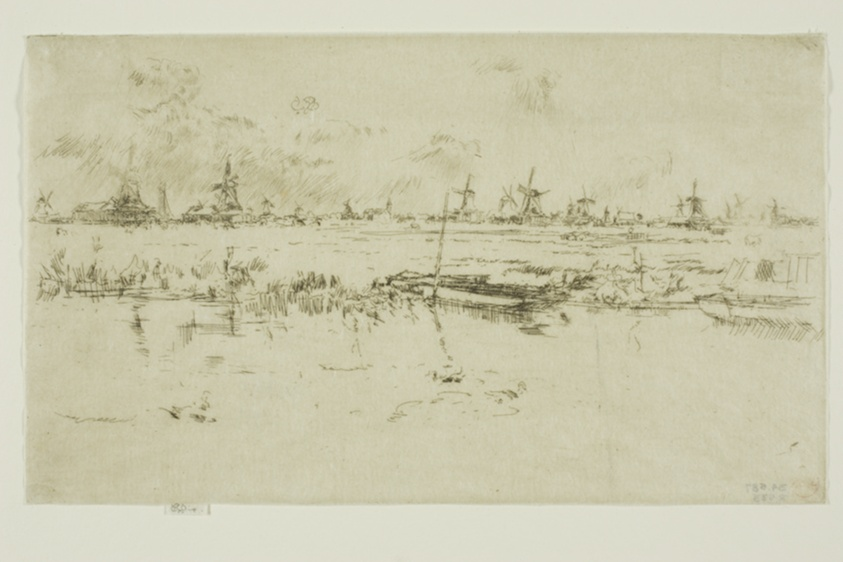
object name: Print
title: Zaandam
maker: James McNeill Whistler (American, 1834-1903)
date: 1889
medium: Etching and drypoint with foul biting in black ink on ivory Japanese paper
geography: United States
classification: etching; foul biting; drypoint; print; prints and drawing; paper